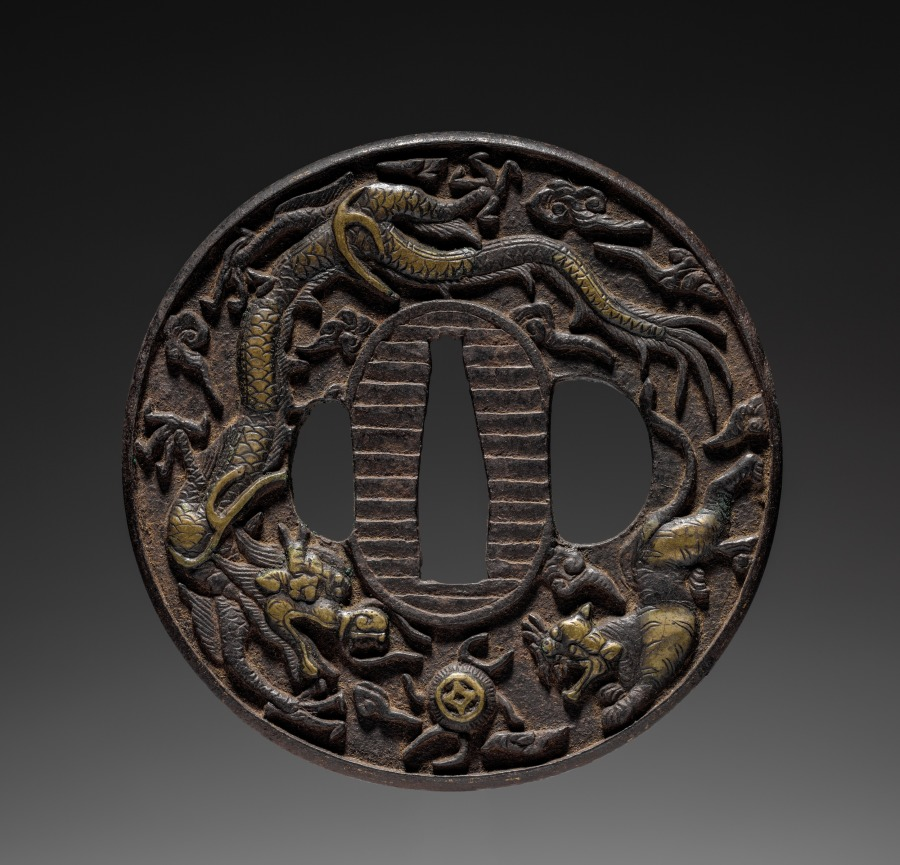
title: Sword Guard (Tsuba) with Dragons, Tiger, Fish, and Palace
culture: Japan, possibly Edo period (1615-1868)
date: c. 1615–1868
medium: iron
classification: Arms and Armor